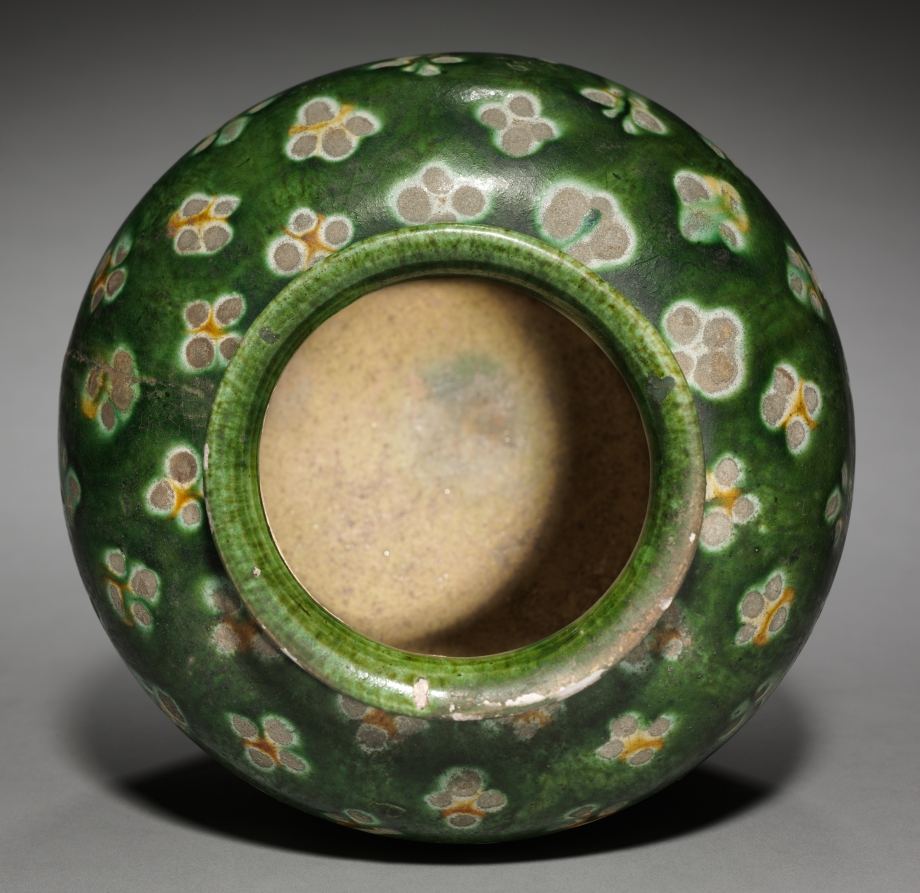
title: Jar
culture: China, Tang dynasty (618-907)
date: late 600s–700s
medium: glazed pinkish-buff earthenware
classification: Ceramic